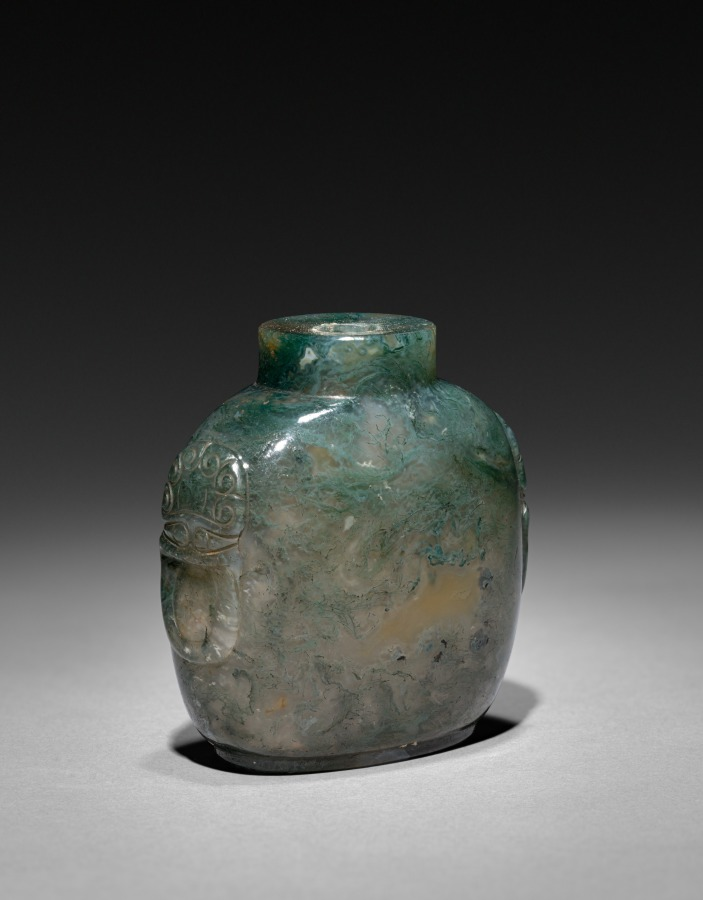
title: Snuff Bottle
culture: China, Qing dynasty (1644-1911)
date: 1644–1911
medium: glass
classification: Glass